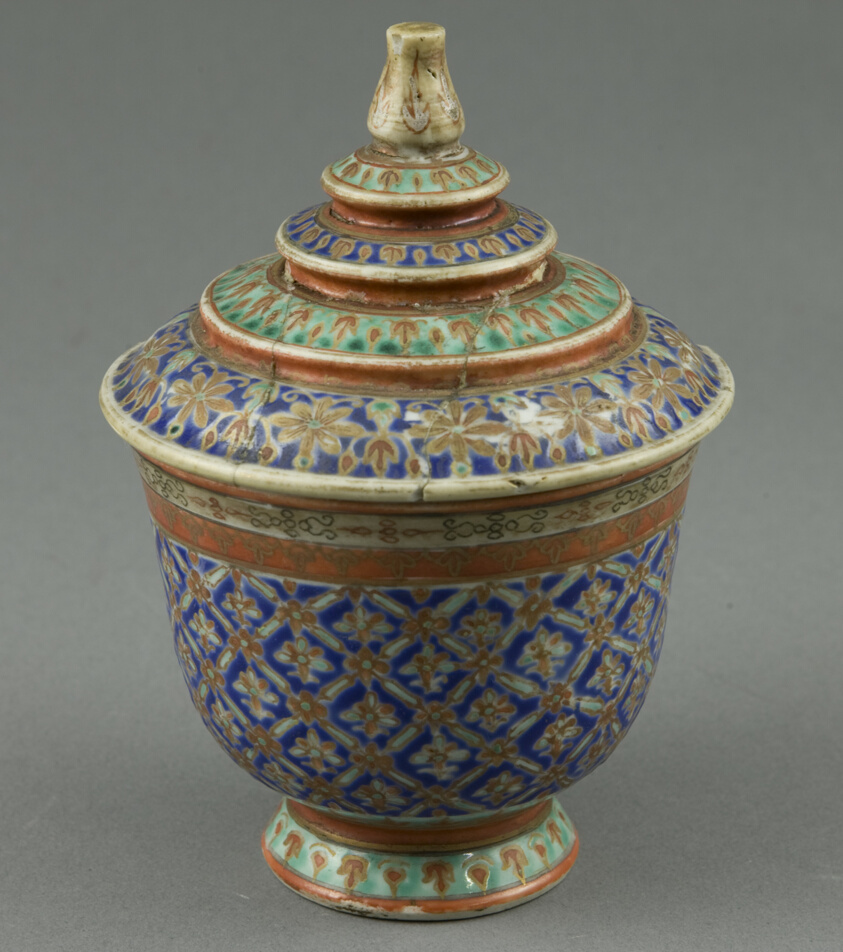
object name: Decorative Arts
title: Bencharong (Five-Colored) Ware, Jar with Tiered Cover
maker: China, for the Thai Market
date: 19th century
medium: Porcelain painted in overglaze polychrome enamels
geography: China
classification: porcelain; asian art; ceramics; decorative arts